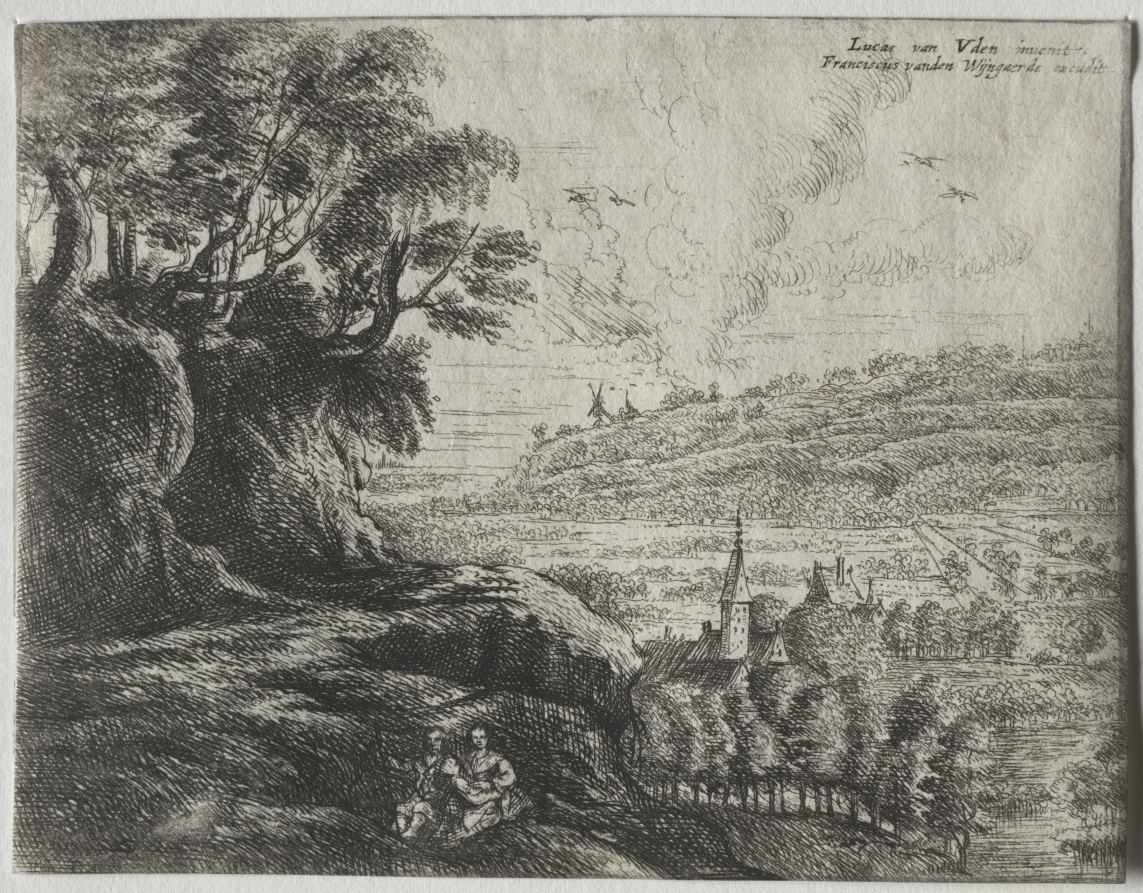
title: Landscape with a Peasant Couple and Baby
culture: Netherlands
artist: Lucas van Uden (Dutch, 1595–1672/73)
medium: etching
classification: Print